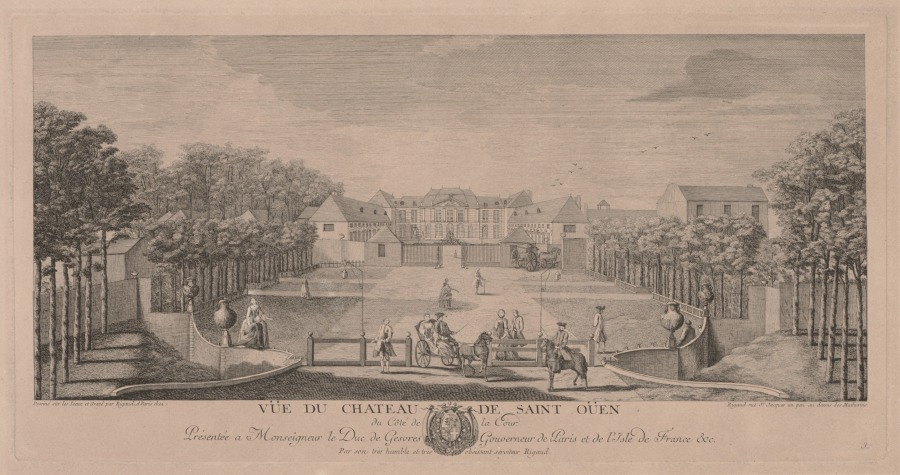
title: Chateau Saint Ouen from the Court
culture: France, 18th century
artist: Jacques Rigaud (French, 1681–1754)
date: c. 1720–50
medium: engraving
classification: Print